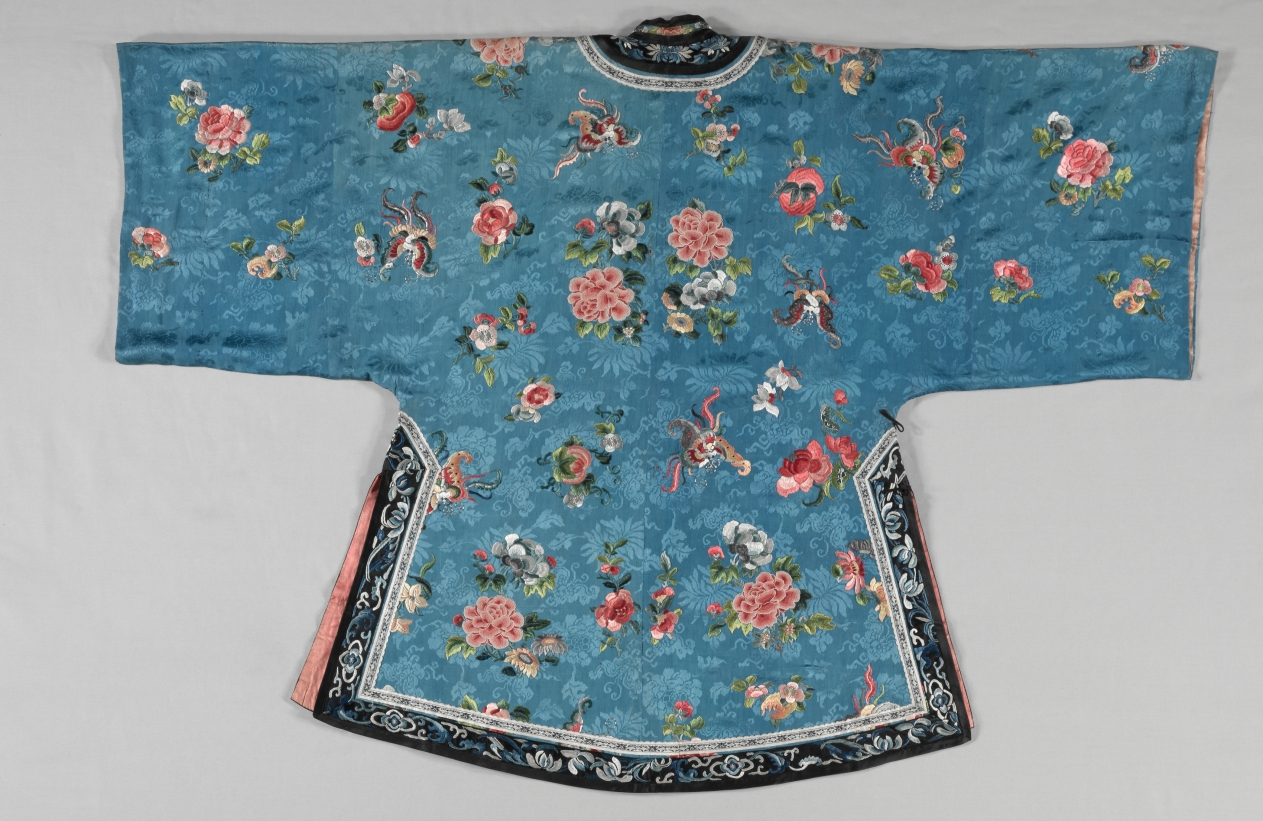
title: Han Woman's Jacket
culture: China, Qing dynasty (1644–1911)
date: 1880s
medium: Silk: embroidery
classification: Garment